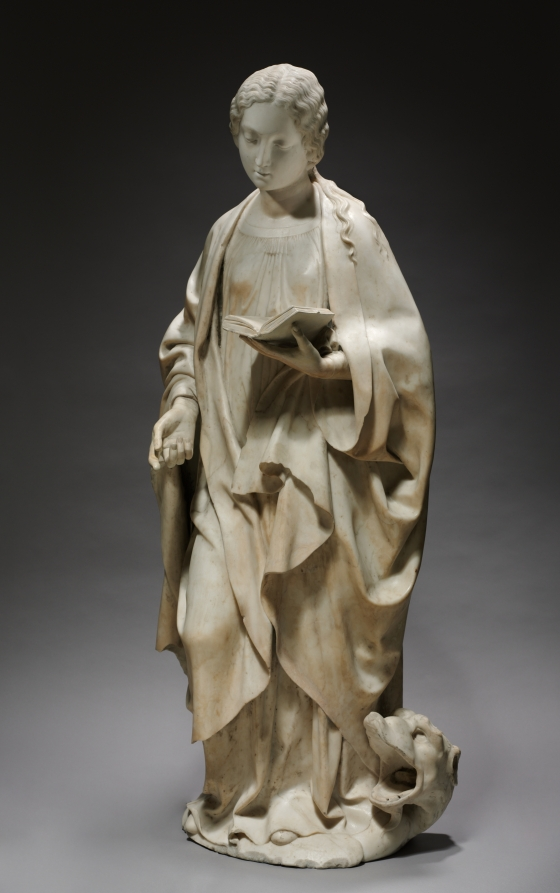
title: Saint Margaret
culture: Italy, Sicily, Palermo, 16th century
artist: Antonello Gaggini (Italian, 1478–1536)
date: c. 1520–1530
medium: marble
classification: Sculpture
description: Gaggini was a member of a large family of sculptors whose Palermo workshop supplied monumental religious sculptures for the cathedrals of Palermo and Messina in Sicily and Montelione in Calabria. After 1507 Antonello himself worked for 15 years to produce marble sculptures for Palermo Cathedral. This figure of the legendary virgin martyr, Saint Margaret, was probably commissioned for one of these ecclesiastical foundations, possibly the chancel of Palermo Cathedral. The saint is shown reading from a book of hours (a sign of her piety) and trampling upon a dragon, the symbol of Satan. The dragon became the attribute by which she is recognized in sacred art.